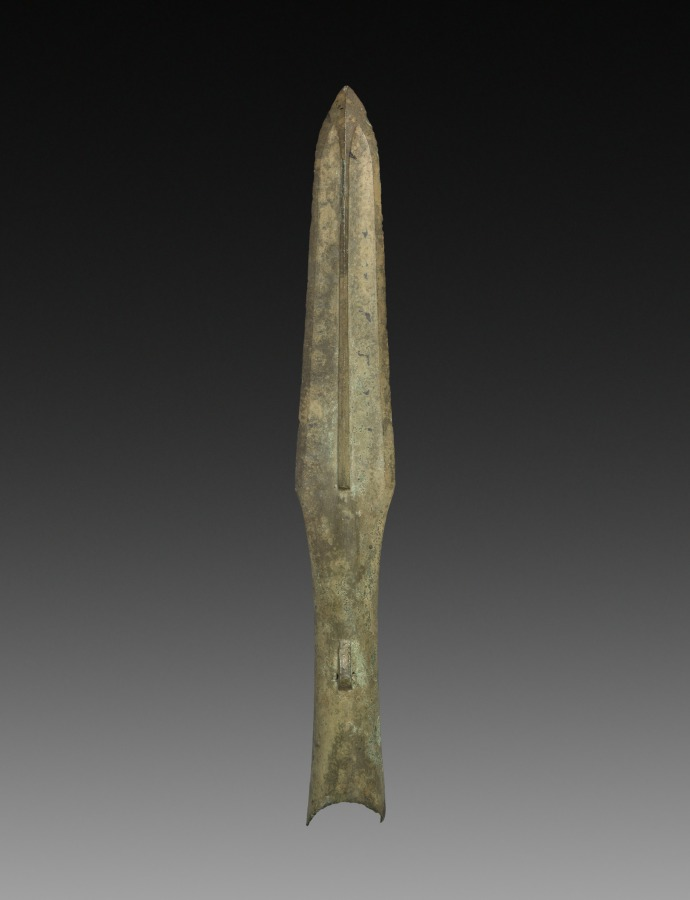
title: Spear Point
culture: China, Zhou dynasty (c. 1046–256 BCE)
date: 1045–256 BCE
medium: bronze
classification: Arms and Armor